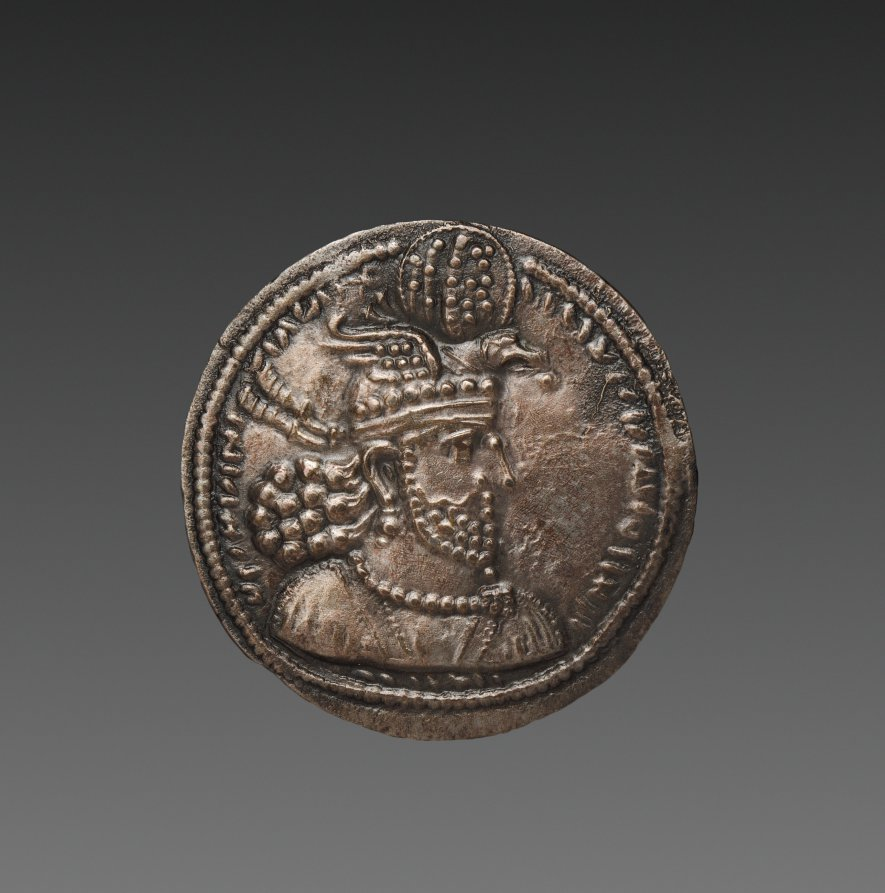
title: Drachm: Bust of Hormizd II, r., wearing crown (obverse)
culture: Iran, (minted), Sasanian Empire (224–651 CE), reign of Hormizd II (303–309)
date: 303–9 CE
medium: silver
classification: Coins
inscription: 𐭬𐭦𐭪𐭠𐭠𐭭𐭬𐭫𐭪𐭠𐭠𐭩𐭫𐭠𐭭𐭬𐭭𐭪𐭲𐭥𐭬𐭭𐭩𐭦𐭣𐭠𐭭 𐭬𐭦𐭣𐭩𐭮𐭭𐭡𐭢𐭡𐭥𐭧𐭬𐭦𐭣